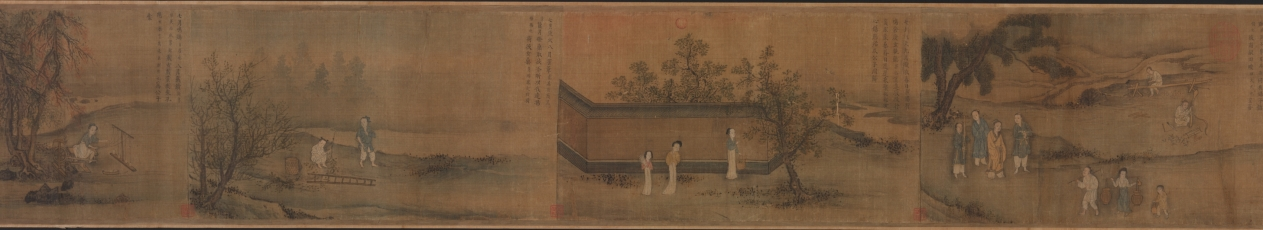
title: "Seventh Month" from the Odes of Bin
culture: China, Southern Song dynasty (1127-1279)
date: 1200s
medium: Handscroll; ink and color on silk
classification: Painting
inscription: Colophons: 1. [on the frontispiece] by the Qianlong emperor (dated 1741). 2. by Lu Wan (dated Zhengde dingchou, 1517). 2. by the Jiaqing emperor (dated 1807).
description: According to Confucian thought, the ruler looks after the well-being of his people which involves agricultural activities. Seventh Month from the ancient Odes of Bin in the Shijing (Book of Poetry) describes occupations throughout the year, including plowing, harvesting, hunting, making clothes, and observing rituals. The earliest illustrations of these Odes accompanied by text were commissioned by Southern Song emperor Gaozong (reigned 1127–1162). As the lower Yangzi delta had become the new seat of government, Gaozong had sets of these illustrations produced by court artists to revive the dynasty and convince the Confucian officialelite of his legitimacy to rule.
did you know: The Odes of Bin appears in the classic Shijing (Book of Poetry), an anthology of more than 300 poems, folk songs, and ceremonial hymns that were originally chanted to music.